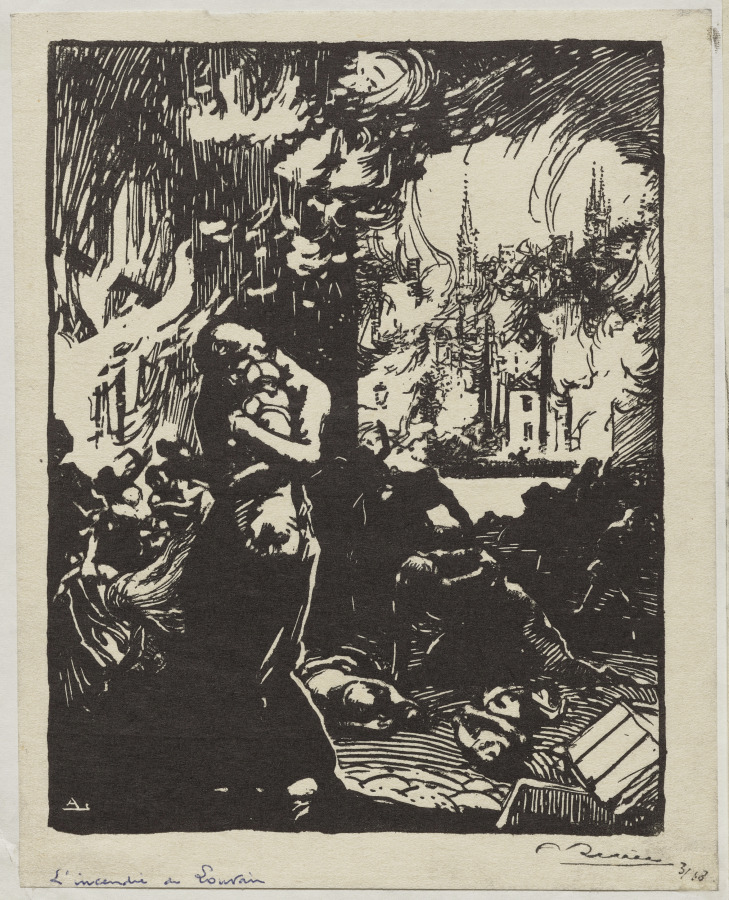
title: L'Incendie de Louvain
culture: France, 20th century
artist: Auguste Louis Lepère (French, 1849–1918)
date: 1914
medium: pen and brush and black ink with white highlights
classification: Drawing